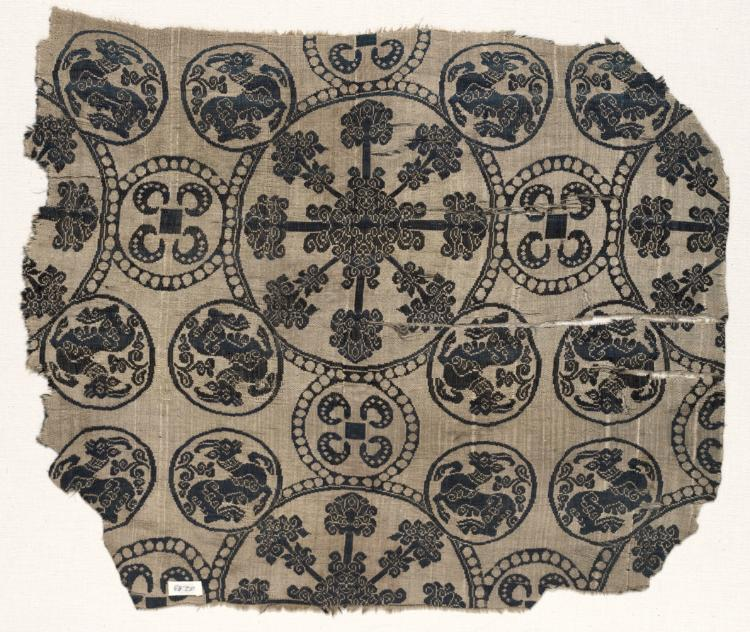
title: Fragment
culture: Iraq or Iran, in the style of the Buyid period (945–1055)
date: before 1952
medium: Silk: compound tabby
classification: Textile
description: Large roundels with pearl borders enclose eight palmette trees radiating from a central abstract floral motif. The large roundels are linked to each other along their vertical and horizontal axes by small roundels, also having pearl borders, that enclose a square and four crescents. Between these links, the large roundels are interrupted by small roundels enclosing single recumbent ibexes. The pattern, which is completely reversible, appears in tan on a dark blue background, or vice versa.